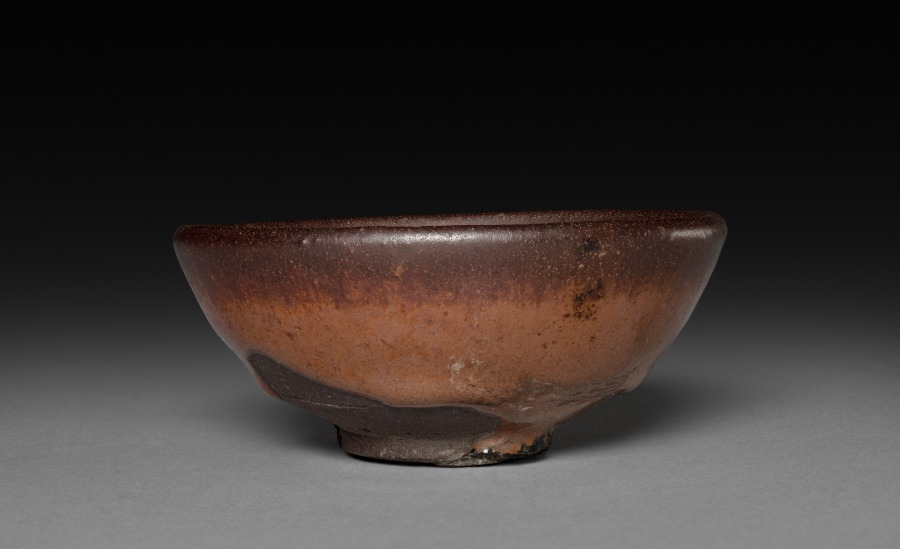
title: Tea Bowl: Jian ware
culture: China, Fujian province, Song dynasty (960-1279)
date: 960– 1279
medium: stoneware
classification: Ceramic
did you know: Jian ware was very popular with the tea cultures in China and Japan.